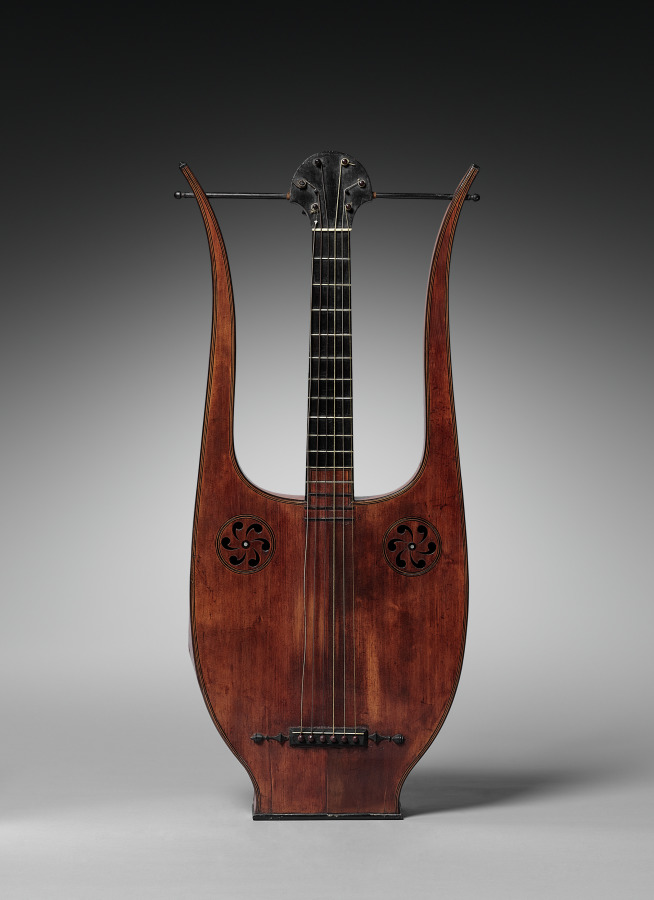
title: Lyre Guitar or Lirachitara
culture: France, 19th century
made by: M. C. Mousset (French)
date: c. 1800–1825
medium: varnished wood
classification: Musical Instrument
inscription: inscribed within sound box: "M. C. Mousset."